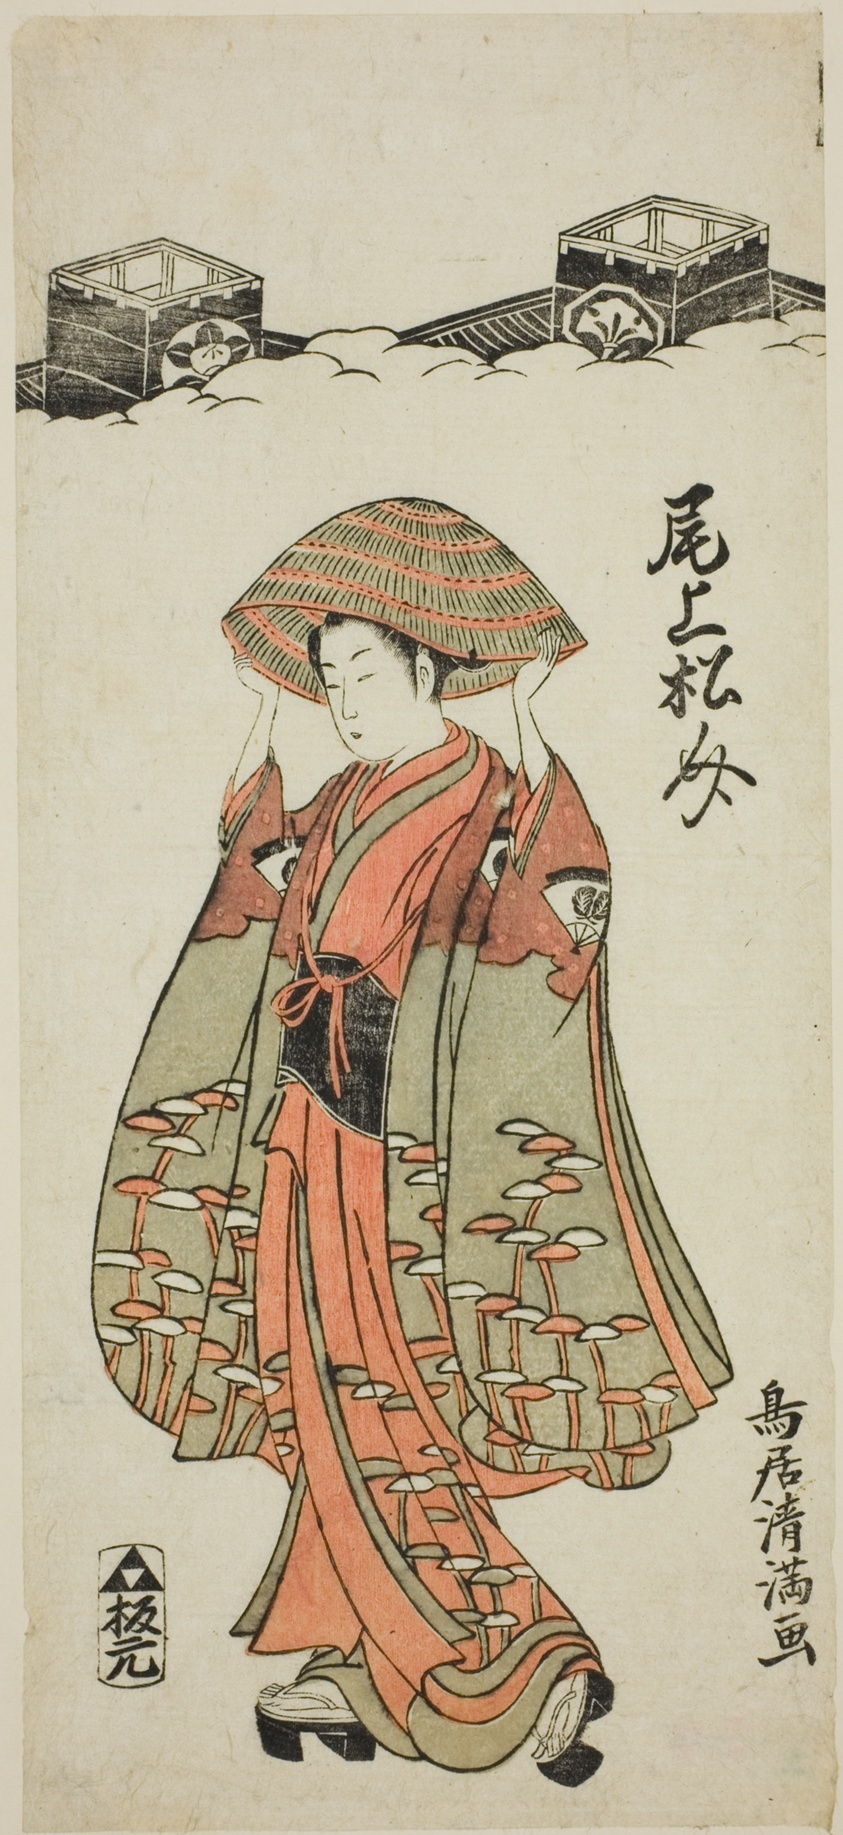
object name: Print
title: The Actor Onoe Matsusuke I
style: Japanese (culture or style)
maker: Torii Kiyomitsu I (Japanese, 1735–1785)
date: c. 1763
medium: Color woodblock print; hosoban, benizuri-e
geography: Japan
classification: woodblock print; print; asian art